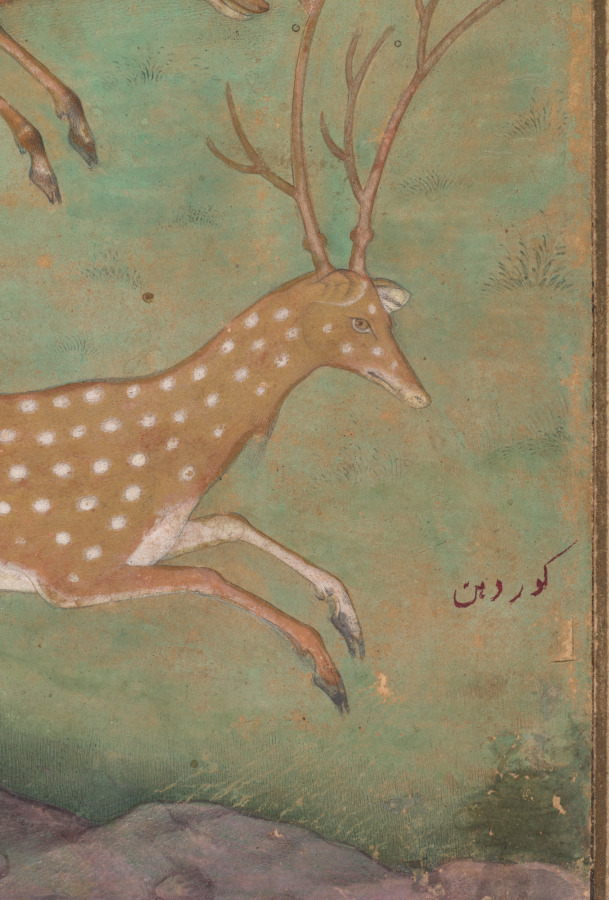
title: Antelope and deer hunt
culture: Mughal India, Allahabad, made for Prince Salim (1569–1627)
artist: Govardhan (Indian, active c.1596–1645)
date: c. 1602–4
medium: Gum tempera and gold on paper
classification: Painting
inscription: recto, lower right: Govardhan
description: The Mughals used trained cheetahs, such as this one wearing a red collar, to capture prey during hunting expeditions in the wilderness. The metaphor of the hunt was also a potent image in Persian literature, in which the protagonist finally achieves a desired goal. The central image of the cheetah catching the black buck—a frequently repeated visual trope—resonates with the desire of Prince Salim (who was passionate about hunting) to capture the throne of the Mughal Empire from Akbar, his father. Between 1600 and 1605, when Prince Salim set up his own royal court in defiance of his father, he convinced some imperial artists to join him. The young Govardhan, a Hindu who would go on to achieve high stature in the atelier of the next two emperors, was one of them.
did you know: The gray antelope in the foreground is called a nilgai and is the largest antelope in Asia.